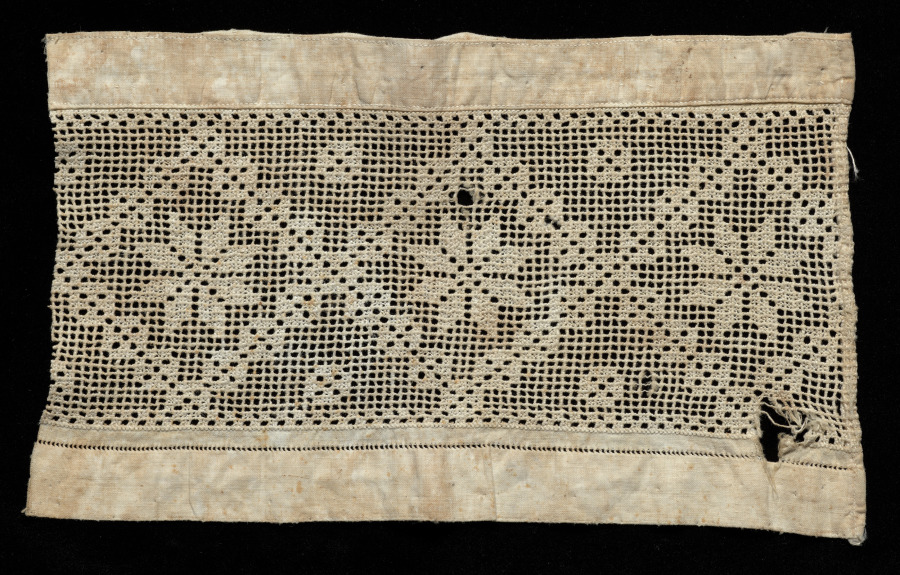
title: Fragment of a border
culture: Spain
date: 1800s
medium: Needle lace (drawnwork)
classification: Lace